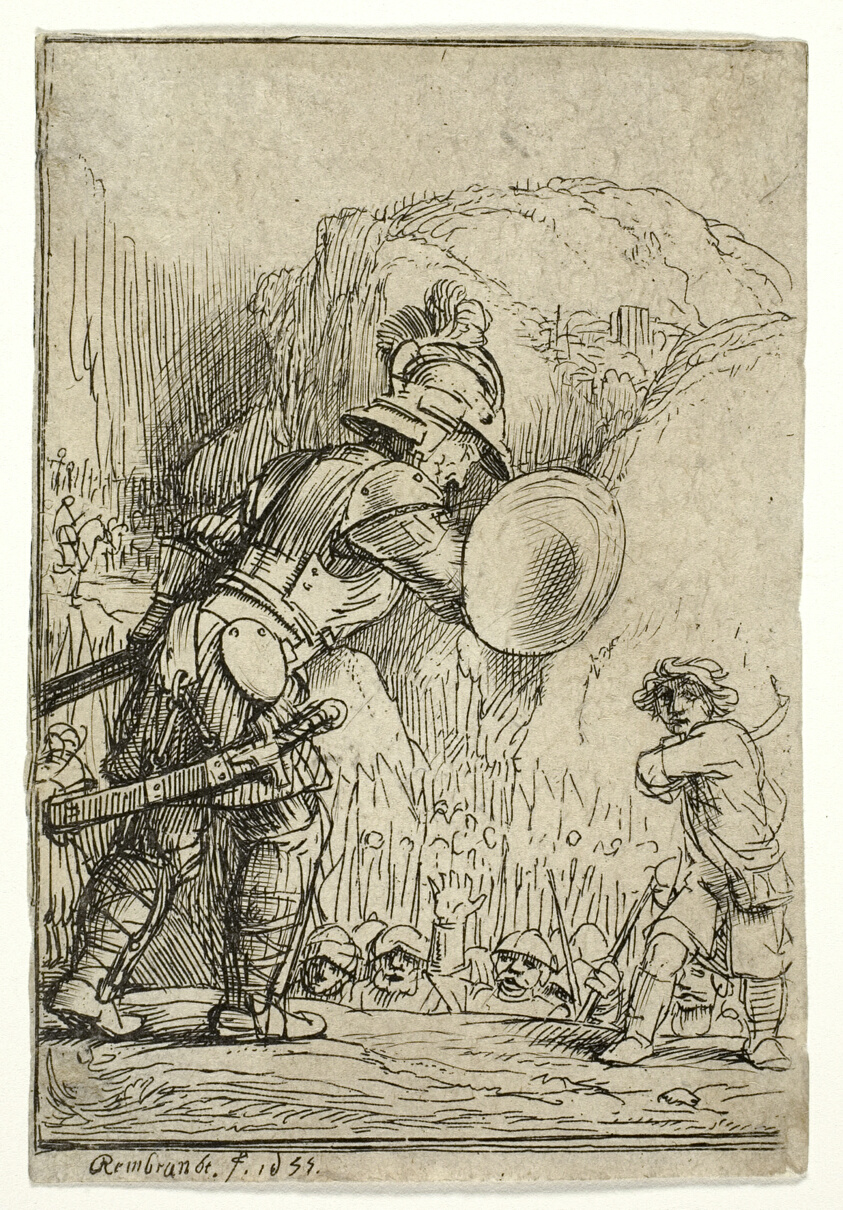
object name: Print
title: David and Goliath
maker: Rembrandt van Rijn (Dutch, 1606-1669)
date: 1655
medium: Etching, engraving, and drypoint on paper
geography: Holland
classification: etching; print; prints and drawing; paper; drypoint; engraving